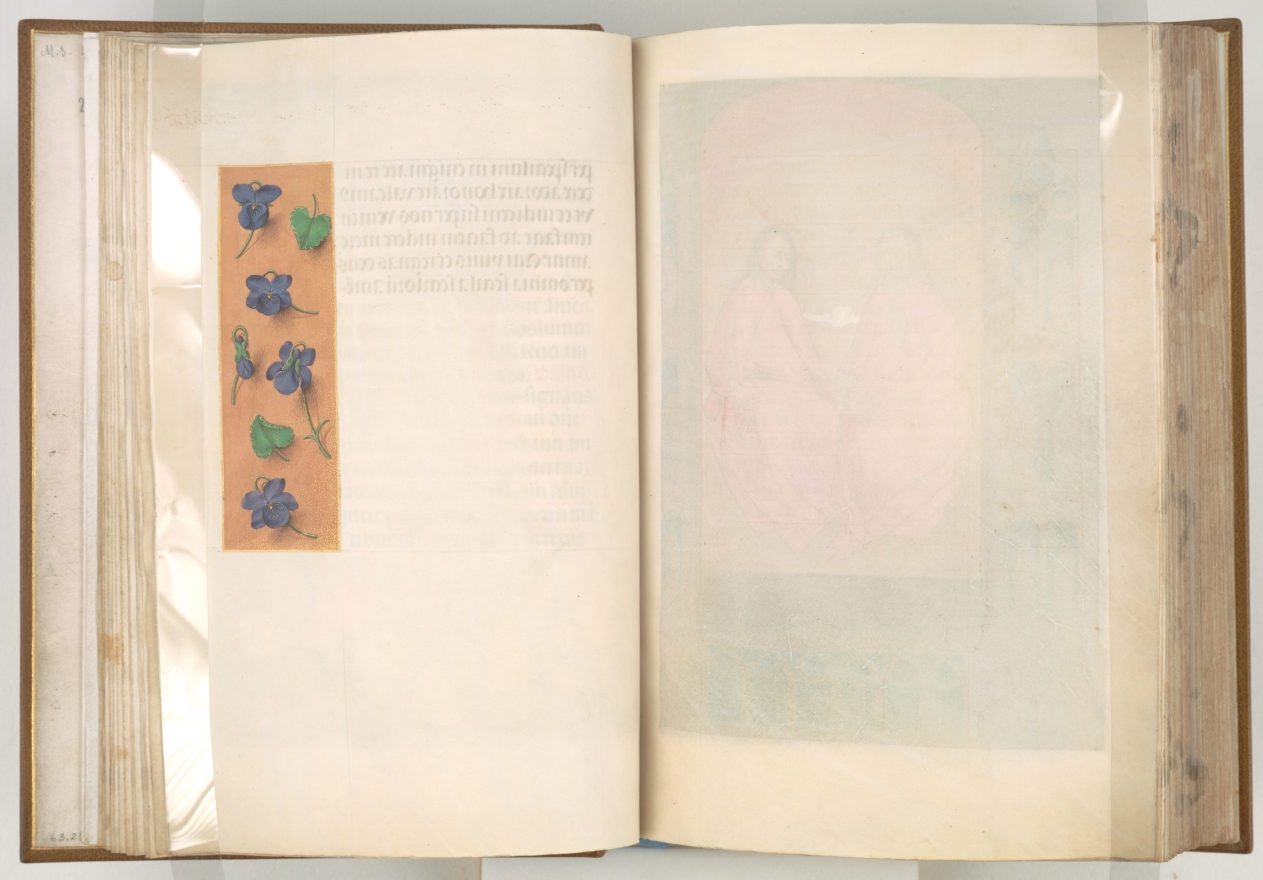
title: Hours of Queen Isabella the Catholic, Queen of Spain: Fol. 17r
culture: Flanders, Ghent and Bruges, late 15th century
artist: Master of the First Prayerbook of Maximillian (Flemish, c. 1444–1519)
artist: and Associates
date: c. 1500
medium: ink, tempera, and gold on vellum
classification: Bound Volume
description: This manuscript was illuminated by a circle of at least five highly organized manuscript painters active in the Flemish cities of Ghent and Bruges. The principal illuminator was Alexander Bening, who painted the majority of the book's miniatures. Manuscripts produced by this circle of artists are renowned for the decoration of their borders, which typically feature a rich variety of realistically-painted flowers, birds, and butterflies. This prayer book, called a book of hours, was intended not for a cleric, but for the private devotions of a lay person-in this case, Isabella the Catholic, Queen of Spain (1451-1504). Isabella's coat of arms embellishes the book's frontispiece. It is unlikely that the book was commissioned by the Queen herself; rather, she probably received it as a diplomatic gift from someone courting her patronage, perhaps Cardinal Francisco Jimenez de Cisneros. A Franciscan friar, Jimenez was dependent upon Isabella for his advancement, first to the post of Queen's confessor in 1492, and then to Archbishop of Toledo in 1495.